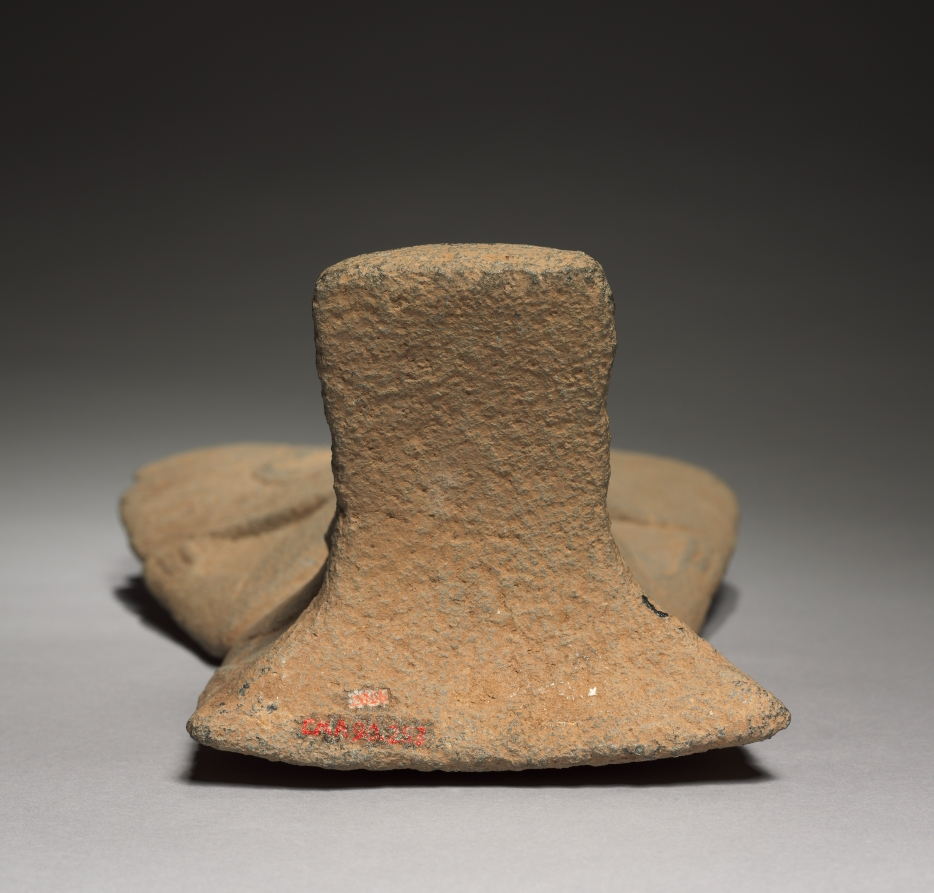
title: Ballgame Palma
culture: Mexico, Gulf Coast, Classic Veracruz style (600-1100)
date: 900–1100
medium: stone, pigment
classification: Sculpture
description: Stone palmas, so-called today for their palm-frond-like shape, are ceremonial sculptures that may replicate lightweight gear worn over the chest during the ballgame. Palma imagery is not well-studied and the meaning of the caiman (New World alligator) carved on both sides of this example is unknown. The tail is beautifully adapted to the palma's curved upper edge.